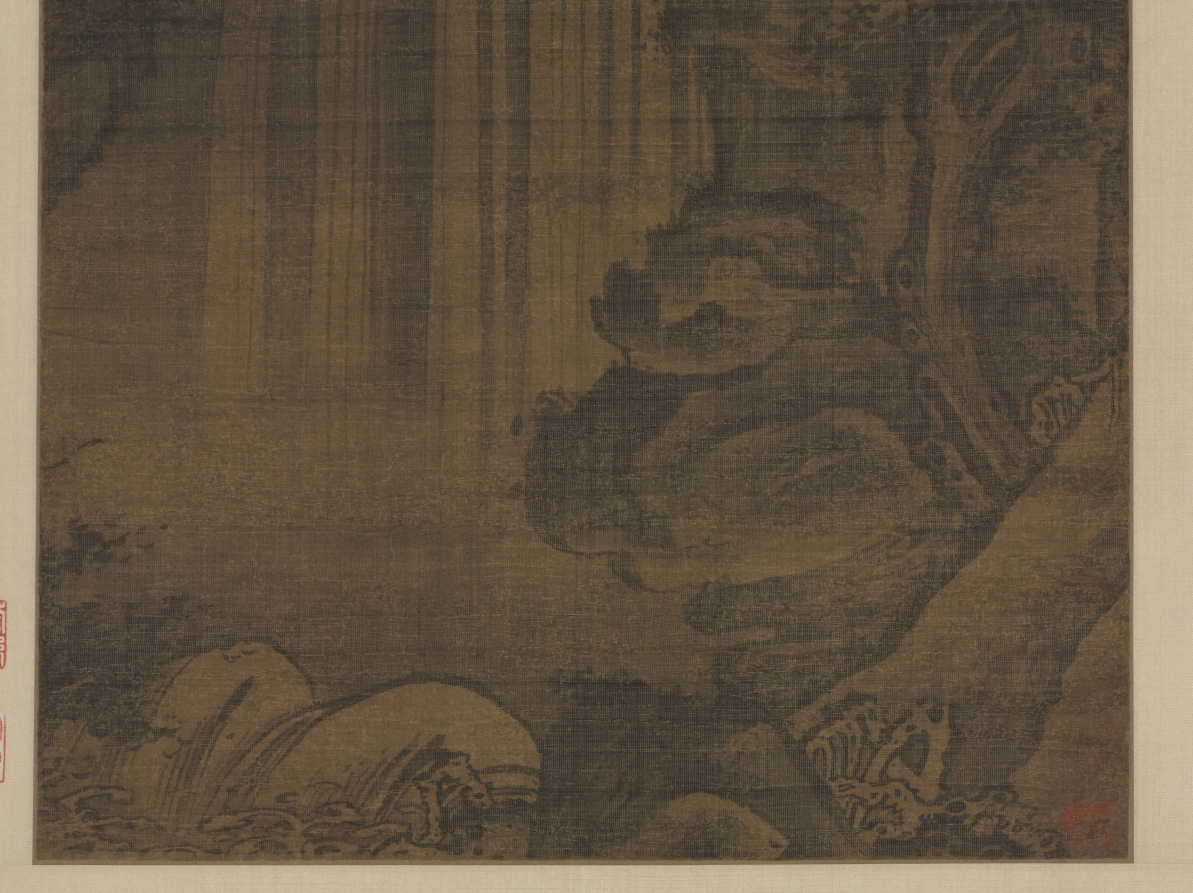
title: Waterfall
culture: China, Song dynasty (960-1279) - Yuan dynasty (1271-1368)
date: 1271–1368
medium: hanging scroll, ink and slight color on silk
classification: Painting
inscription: Label on the mounting with 2 seals of T'ang ? of Pi-ling (16th c.); label on back of mounting of Kü Kuang-hsü (1731-1797). 1 colophon and 8 additional seals: 1 colophon, dated 1625, and 2 seals of Kao P'an-lung (1562-1626); 2 seals of Liu Shu (1759-1816); 1 seal of Pi Lung (late 18th c.); 1 seal of Ts'ao tzu-wen; 2 seals unidentified. WKH